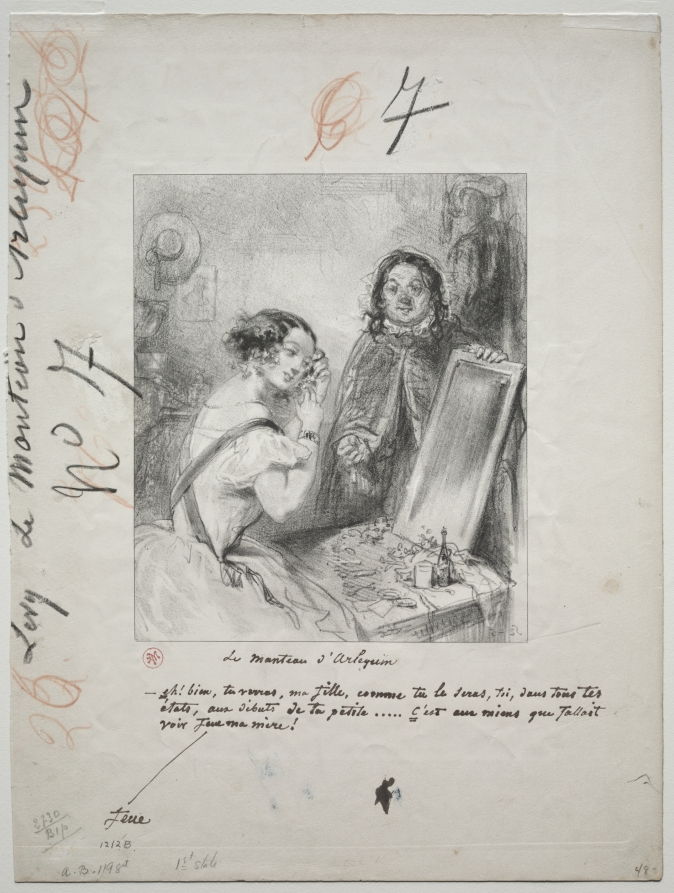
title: Le Manteau d'Arlequin: Eh bien ! Tu verra, ma fille...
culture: France, 19th century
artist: Paul Gavarni (French, 1804–1866)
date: 1852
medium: lithograph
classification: Print